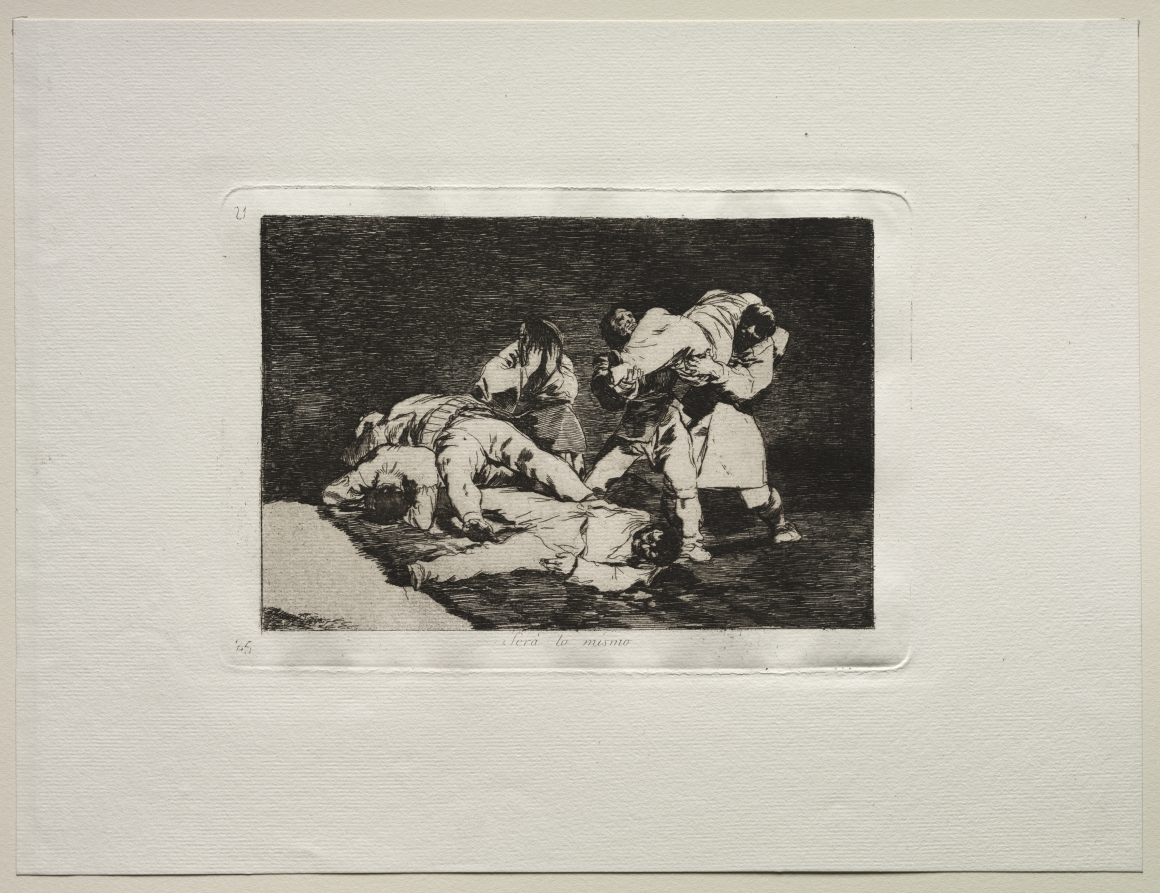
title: The Horrors of War: It Will Be the Same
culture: Spain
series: 20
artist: Francisco de Goya (Spanish, 1746–1828)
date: c. 1810–20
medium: etching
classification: Print